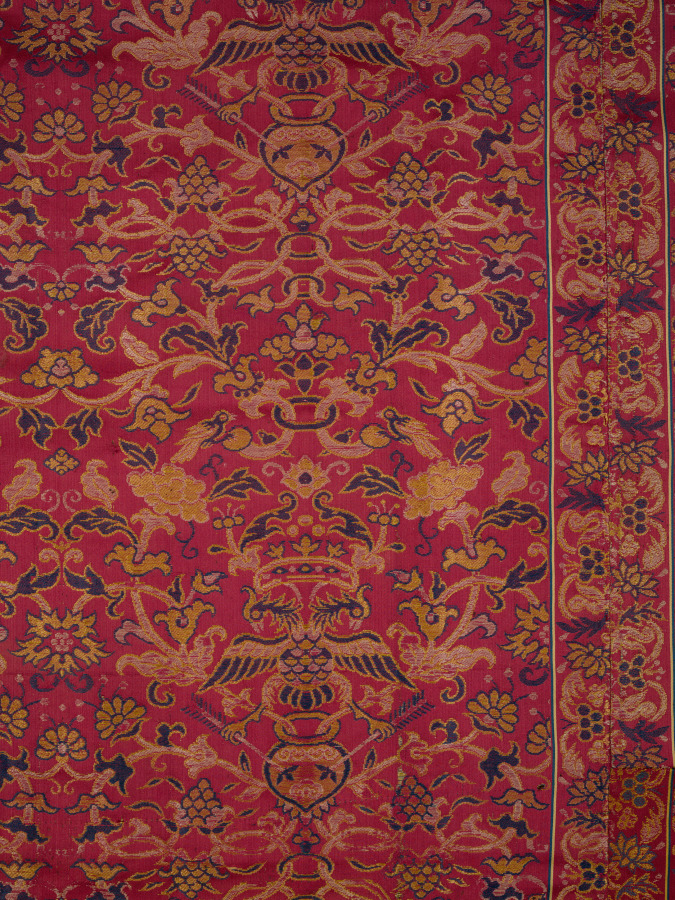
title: Cope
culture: China, Macao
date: 1500s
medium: Silk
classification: Garment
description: Silk fabric woven in China with European motifs was transported by European traders by the early 16th century. This popular pattern features a crowned double-headed eagle grasping arrows in its claws above a vase emitting blossoming vines. The eagle motif was derived from the Habsburg coat of arms, rulers of Spain and Austria during the 1500s and 1600s. Vertical borders with Chinese flora occur near the selvages of the five silk lengths forming the cope. The gilt-metal braided and fringed hood and broad orphrey band, or ornamental border, along the front edges feature fashionable small-scale floral sprigs.